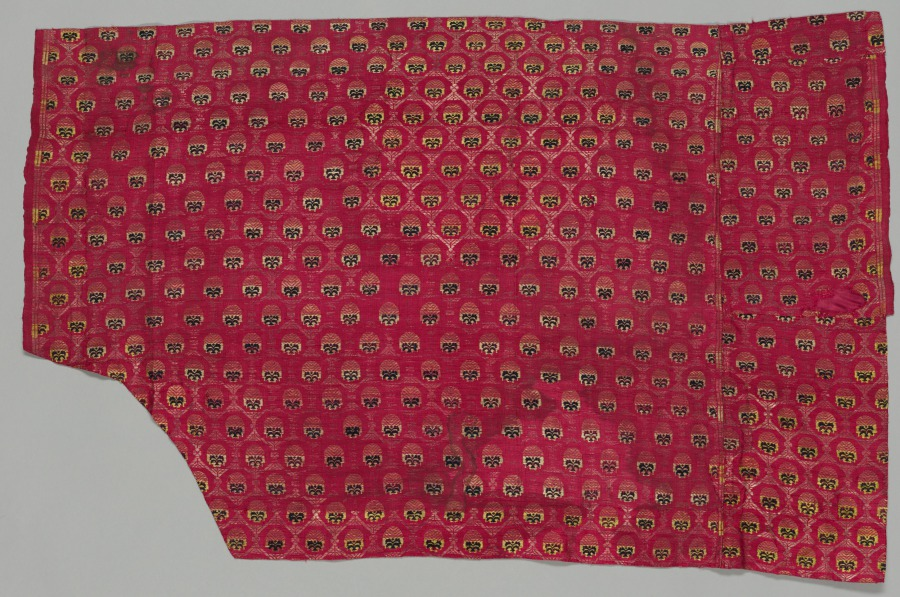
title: Brocade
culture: India, Benares ?, 18th-19th century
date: 1700s - 1800s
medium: brocade, Kimkhwab; silk and cotton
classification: Textile